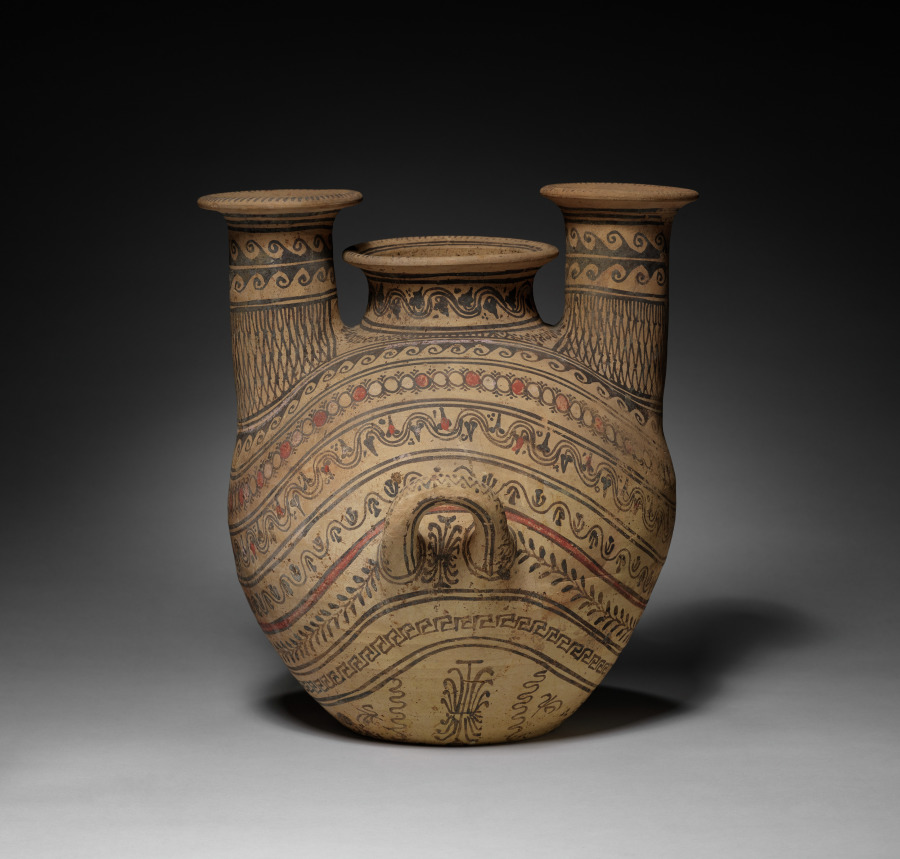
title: Two-Spouted Strainer Askos (Flask)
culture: South Italian, Daunian or Canosan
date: 300–200 BCE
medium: ceramic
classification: Ceramic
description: Although now referred to by the Greek term askos, because of its resemblance to the animal skins used to hold wine in ancient Greece, this ceramic shape developed in the South Italian region of Daunia (north of Apulia, on the Adriatic coast). This example is unusual for its three openings—one covered by a lid, the others spouted with built-in strainers. Its profusely painted decoration, mostly geometric and vegetal patterns applied in black with added red and white, is arranged in bands that follow the contours of the vessel.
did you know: Each spout has a built-in strainer—one near the top, the other near the bottom.